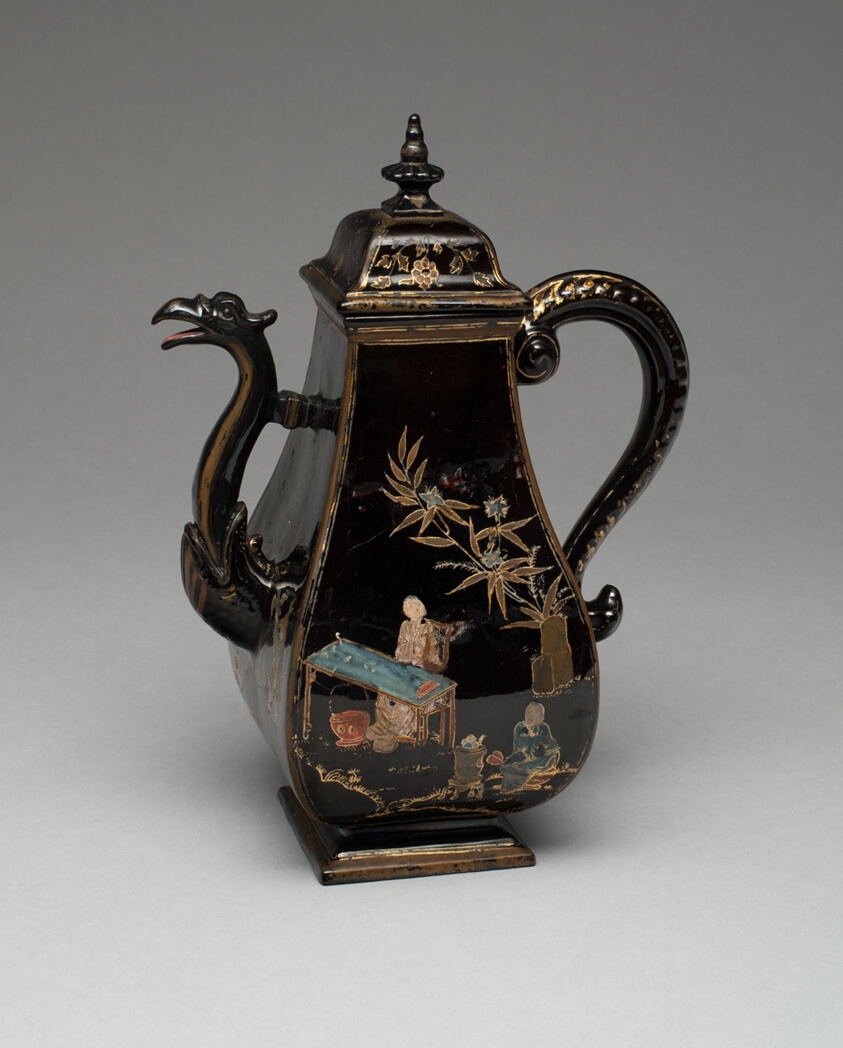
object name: Ceramics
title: Coffeepot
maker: Meissen Porcelain Manufactory (German, founded 1710)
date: c. 1715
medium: Red stoneware lacquered black, with unfired colors and gilding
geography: Meissen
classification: teaware; ceramics; stoneware; european decorative arts